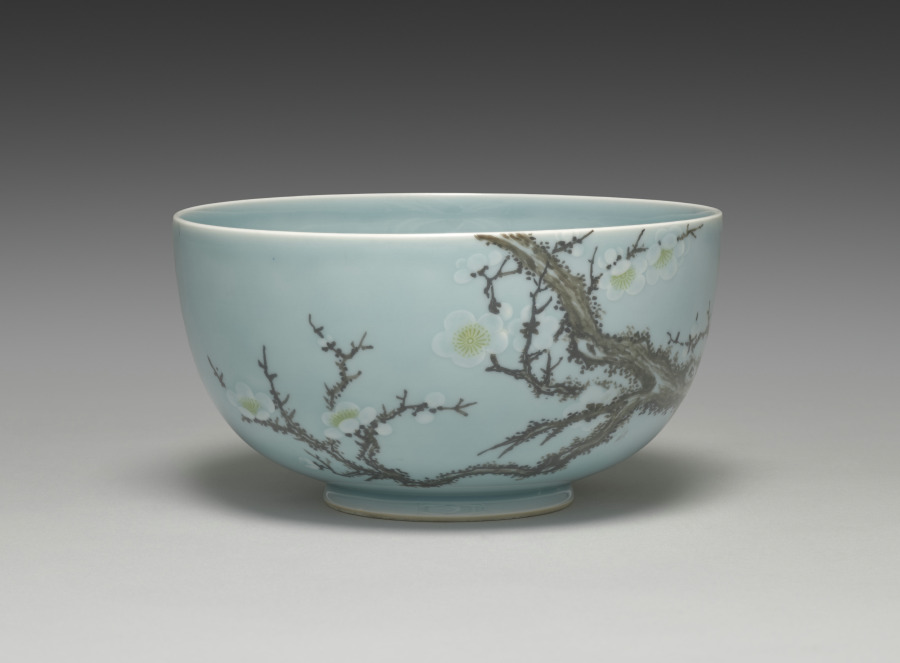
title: Sweets Bowl with Plum Tree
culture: Japan, Taishō period (1912–26) to Shōwa period (1926–89)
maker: Seifū Yohei IV (Japanese, 1872–1951)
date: 1914–46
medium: Porcelain with underglaze color and modeled design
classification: Ceramic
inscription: 清風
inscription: 清風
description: In Chinese culture, the plum symbolizes the virtue of perseverance. For his sweets bowl based on Qing dynasty (1644–1911) Chinese prototypes, Seifū Yohei IV first painted the gnarled boughs of a plum tree in iron oxide on the surface. Then he made the tree’s blossoms slightly raised by building up slip, or liquified clay. He painted their centers yellow. Before applying the blue glaze, he covered the blossoms with paper so that they remained white.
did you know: Broad access to high-quality Chinese ceramics occasioned by the collapse of the Qing dynasty (1644–1911) and the dispersal of elite Chinese collections presented Seifū Yohei IV with models for both molded decoration and painted motifs.